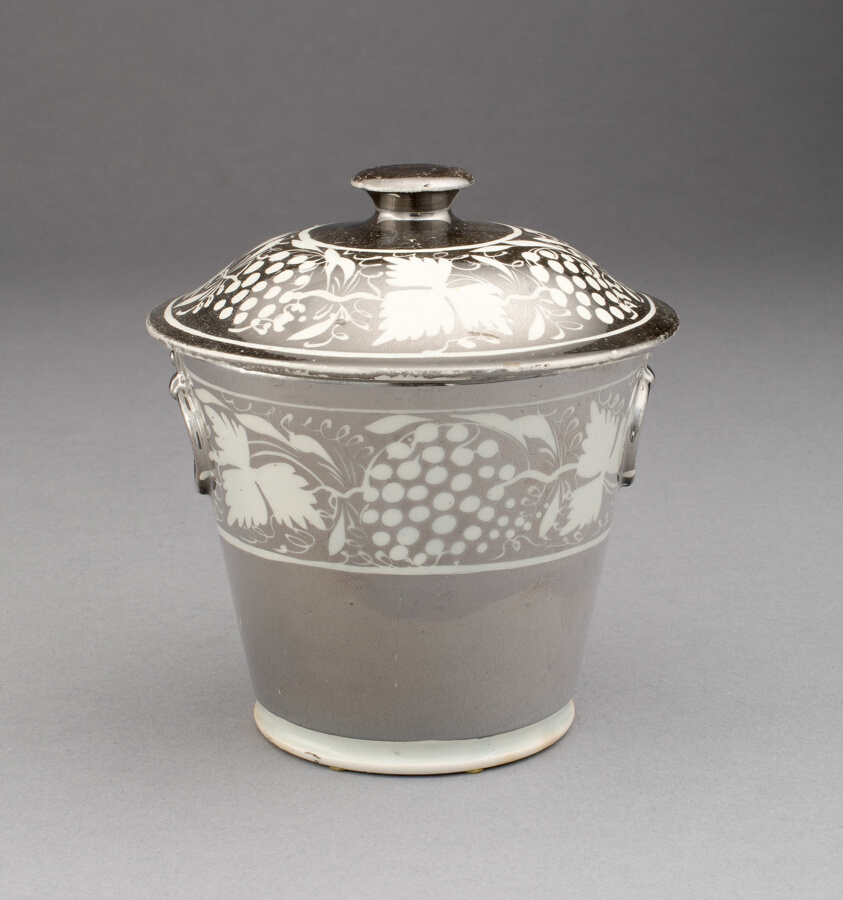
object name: Ceramics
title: Jar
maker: England, Staffordshire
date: c. 1820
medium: Lead-glazed earthenware with lustre decoration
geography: Staffordshire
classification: earthenware; european decorative arts; ceramics